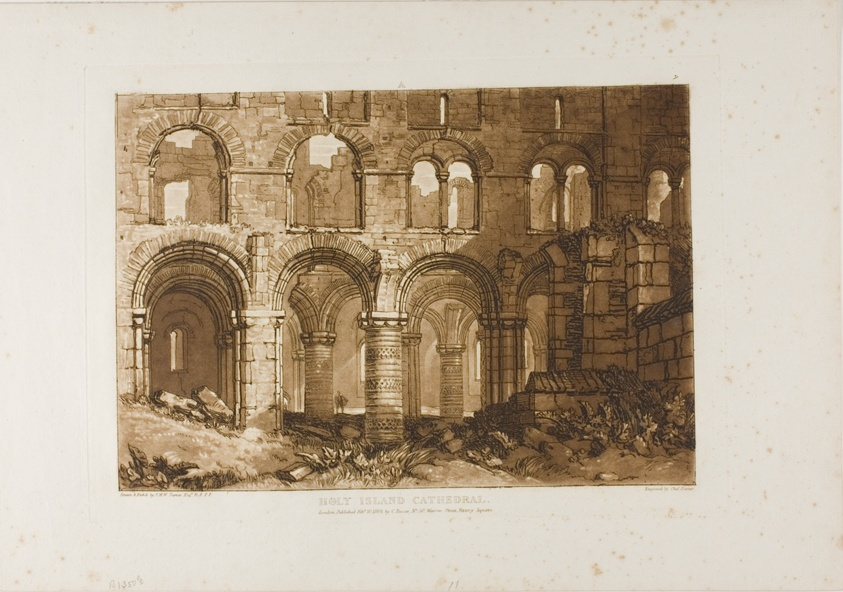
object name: Print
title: Holy Island Cathedral, plate 11 from Liber Studiorum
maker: Joseph Mallord William Turner (English, 1775-1851); Engraved by Charles Turner (English, 1773-1857)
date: published February 20, 1808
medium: Etching and engraving in brown on ivory laid paper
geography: England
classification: etching; print; prints and drawing